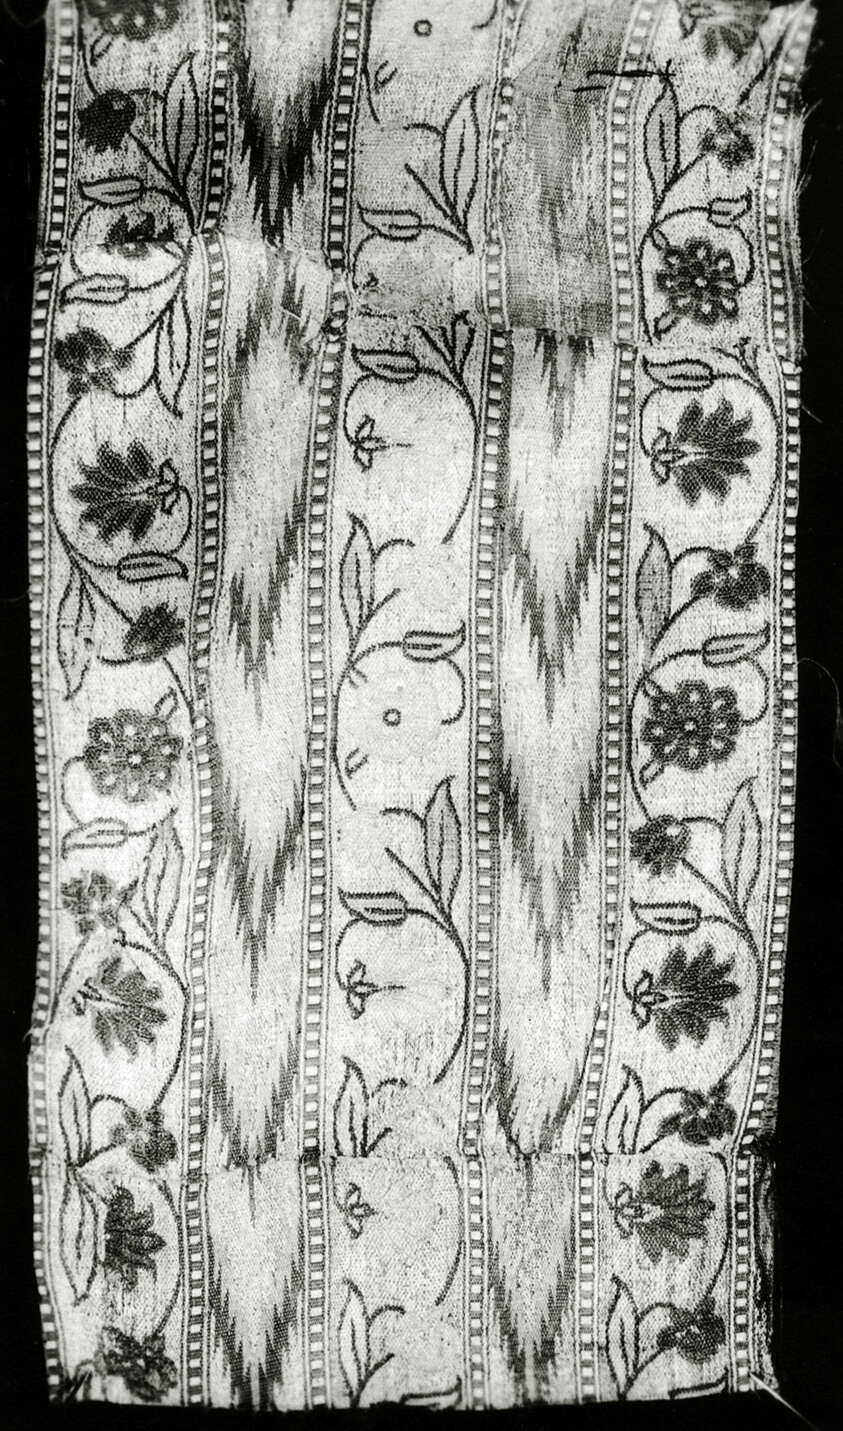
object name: Textile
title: Fragment (Border)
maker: Iran (Persia)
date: 1650/1700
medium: Brocaded plain compound cloth, silk and gold wound on yellow silk core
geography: Iran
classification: textile; weaving